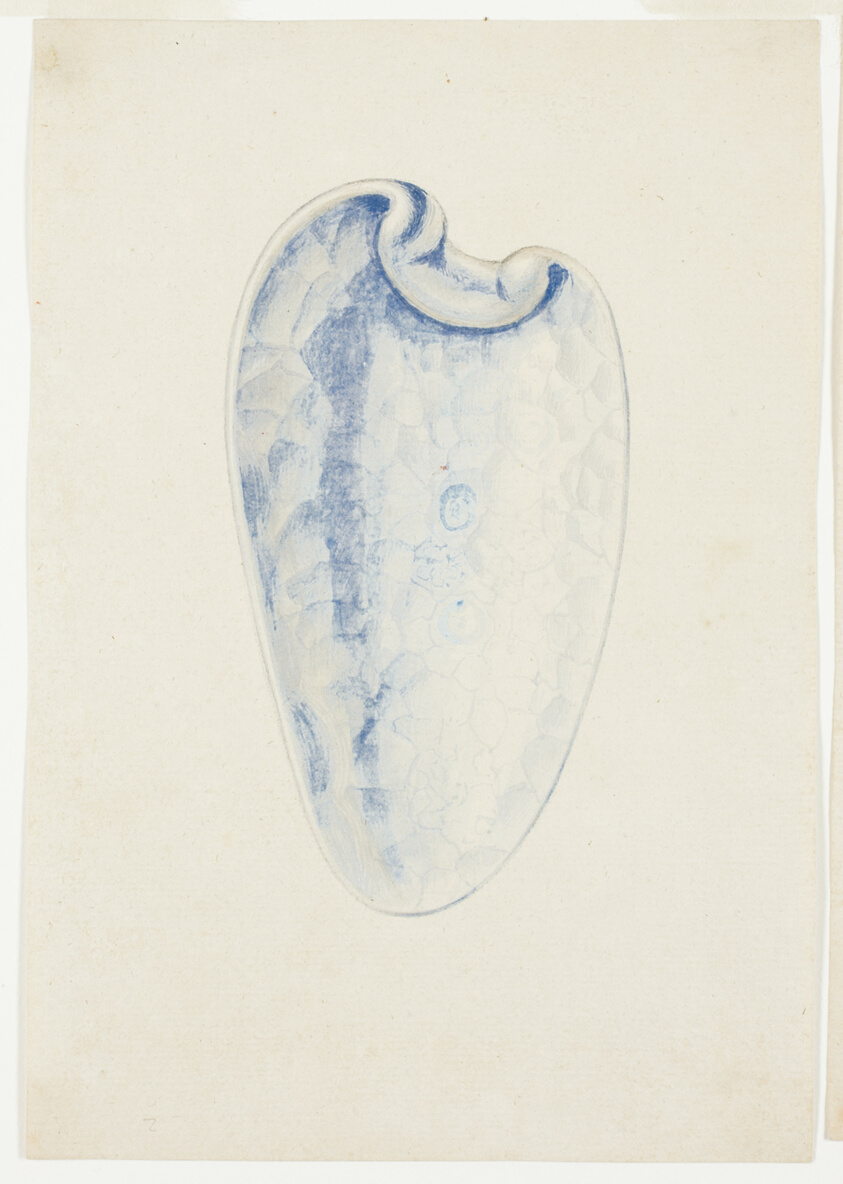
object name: Drawing and Watercolor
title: Overview of Lavender Elongated Shell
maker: Giuseppe Grisoni (Italian, born Flanders, 1699-1769)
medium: Gouache on ivory laid paper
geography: Flanders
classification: gouache; watercolor; drawings (visual works); prints and drawing